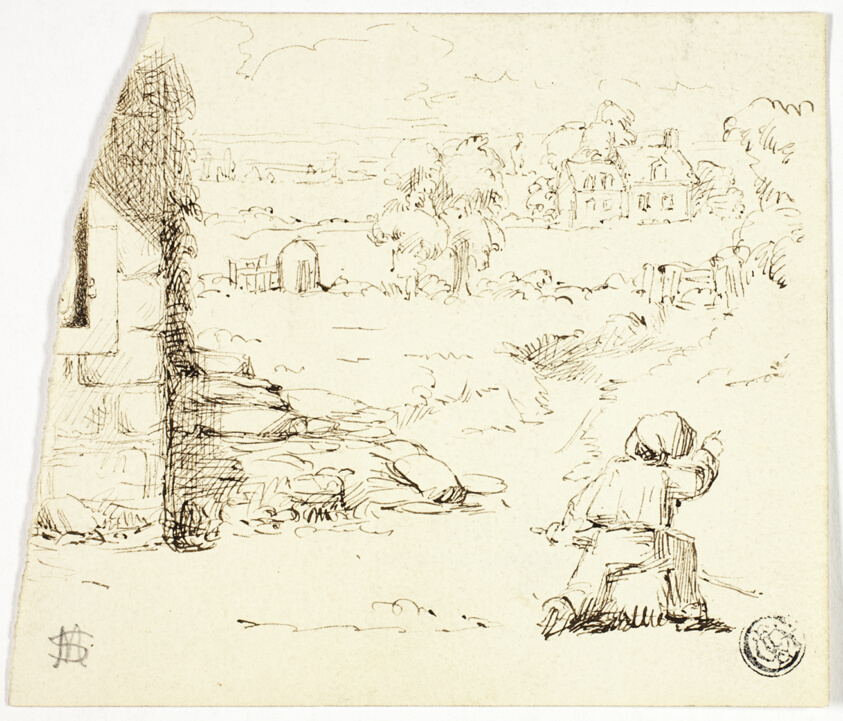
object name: Drawing and Watercolor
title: Landscape with Boy in Foreground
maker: Attributed to Marcus Stone; English, 1840-1921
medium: Pen and brown ink, on ivory wove paper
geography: England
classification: pen and ink drawings; drawings (visual works); prints and drawing